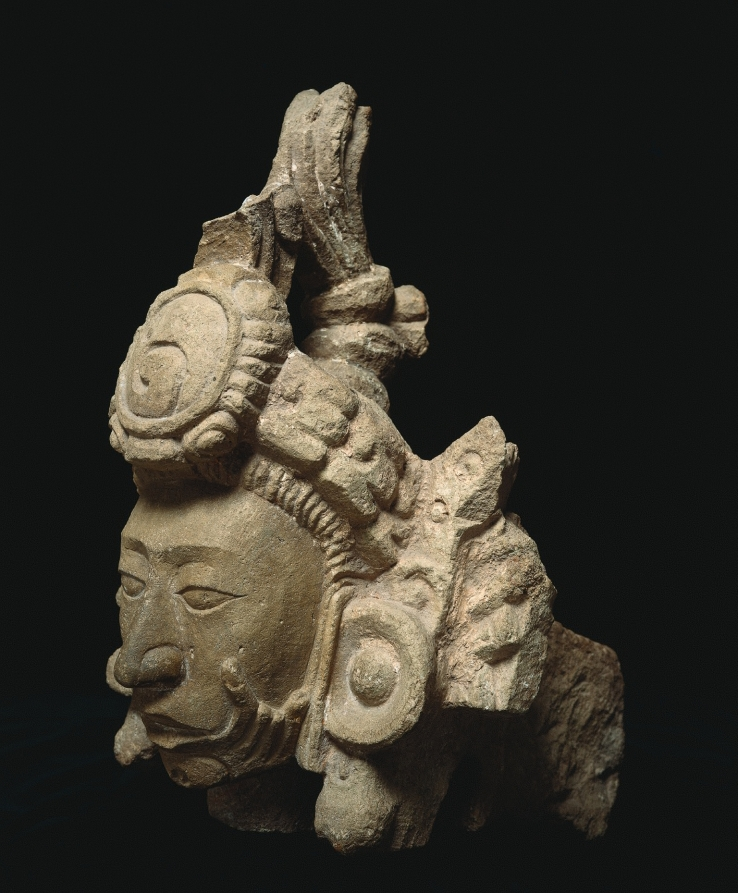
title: Head of a Young Noble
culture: Honduras, Copán, Structure 10L-22A, Maya style (250-900)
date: 746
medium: stone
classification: Sculpture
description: This young noble may be a political official of 8th-century Copán, an important site in eastern Maya territory. The noble, who embodies the Maya ideal of masculine beauty, wears circular ear ornaments and a headband, above which the tied hair rises. The meaning of the disembodied hand that cups the chin is debated. The head, collected by Harvard archaeologists in the 1890s, comes from the facade of a building may have been used as a council house by a Copán ruler and his advisors during a crisis that rocked the city’s ruling dynasty. On the structure’s upper level, above woven mat signs that symbolized political authority, eight figures were enthroned in T-shaped recesses. This head is from one of these figures. Beneath each recess was a hieroglyph thought to name an important town (or family) within Copán’s domain. The figures may represent these towns’ advisors to the king, whose image crowned the structure.